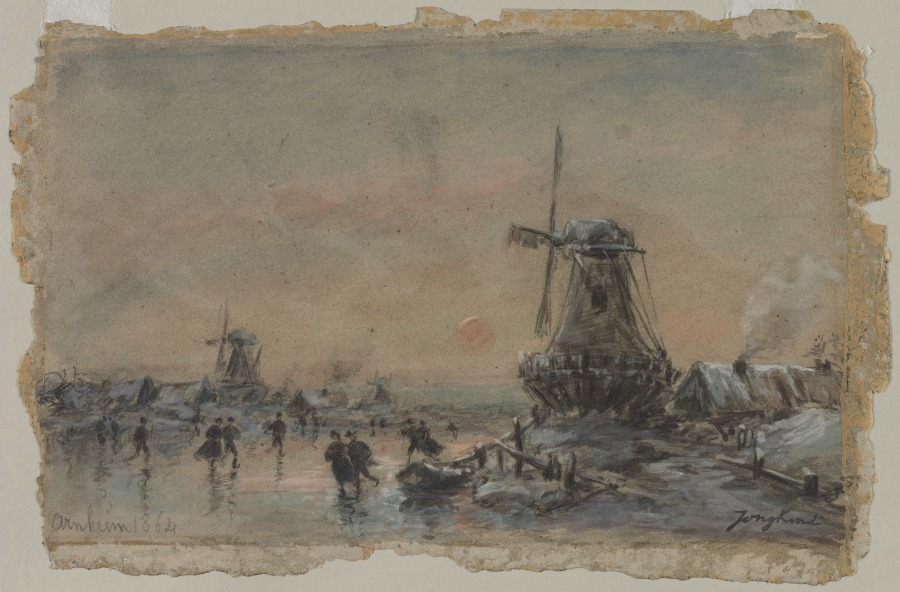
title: View of Arnheim (recto); Studies of a Bull (verso)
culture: Netherlands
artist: Johan Barthold Jongkind (Dutch, 1819–1891)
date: 1864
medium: black chalk, watercolor, and gouache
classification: Drawing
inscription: signed, lower right, in black gouache: Jongkind ; by artist, lower left, in graphite: Arnheim 1864